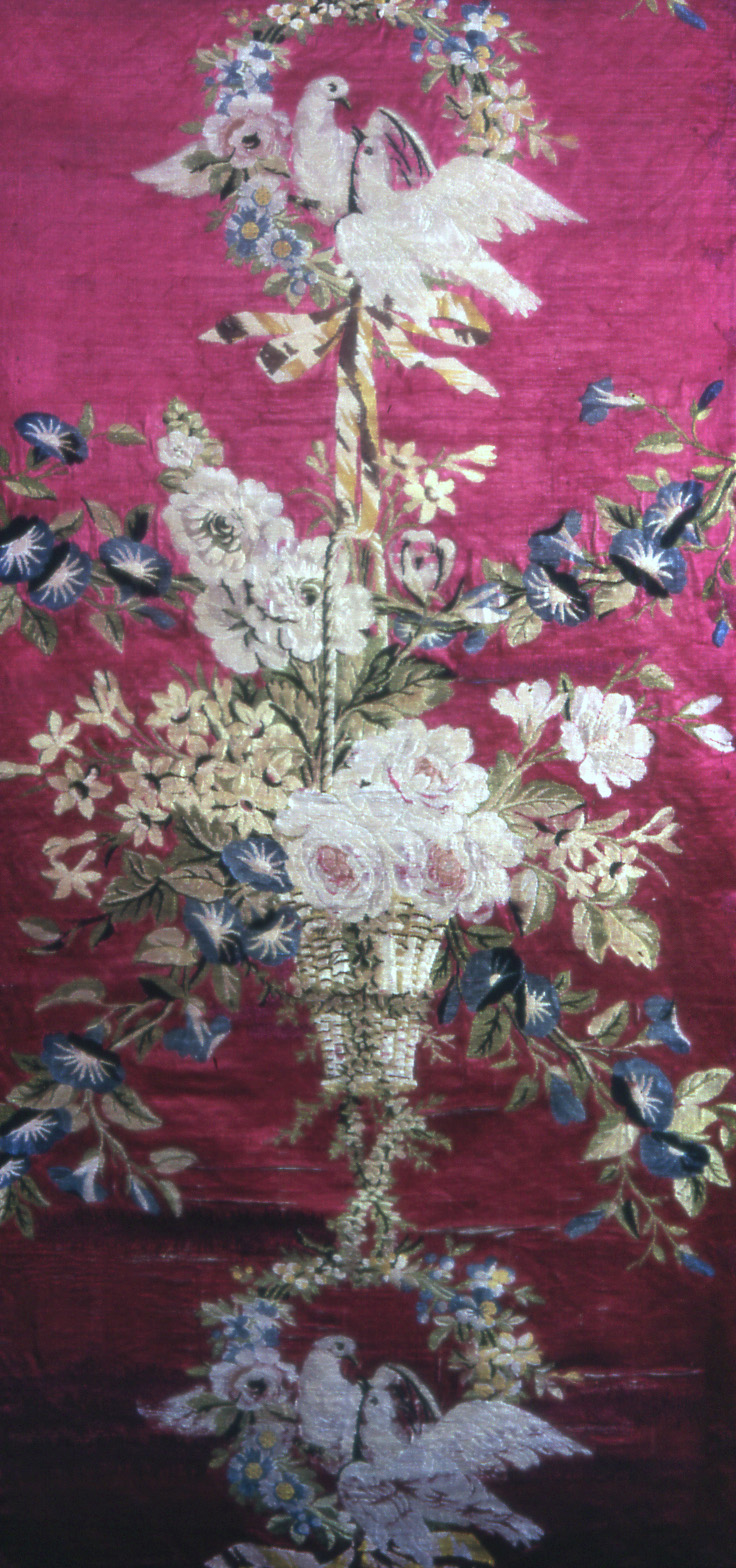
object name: Textile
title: Panel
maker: Designed by Philippe de LaSalle (French, 1723–1803/5); France, Lyon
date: c. 1775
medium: Silk, satin weave with brocading wefts tied in twill weave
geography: Lyon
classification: textile; weaving